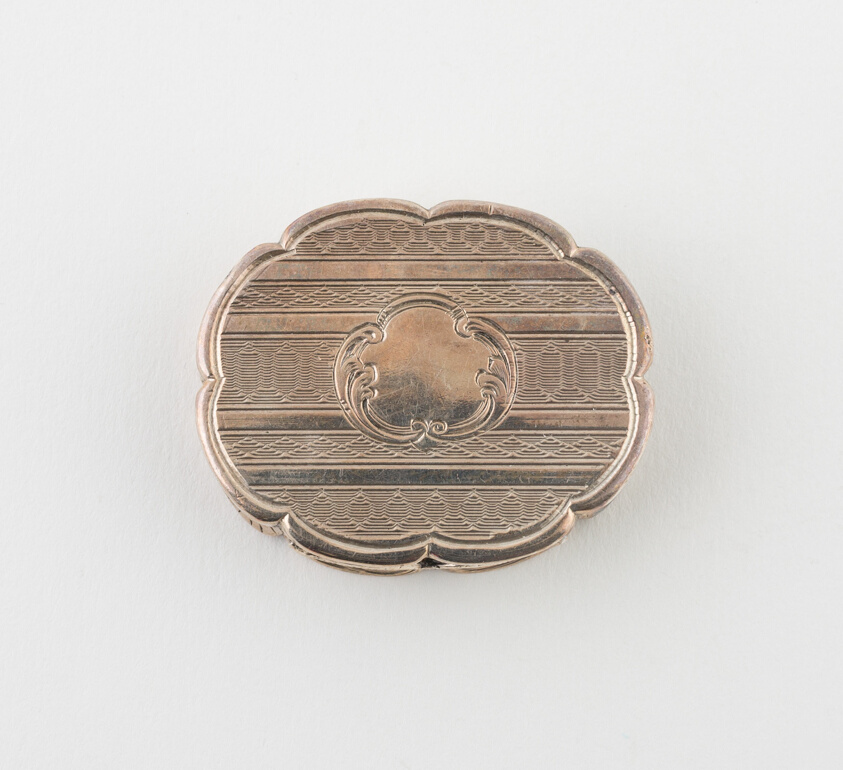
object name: Metalwork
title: Vinaigrette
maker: Edward Smith; Birmingham, England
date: c. 1856/57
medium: Silver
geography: Birmingham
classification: vinaigrette (container for health care); container for personal use; box; european decorative arts; metalwork; silver; decorative object/ornament